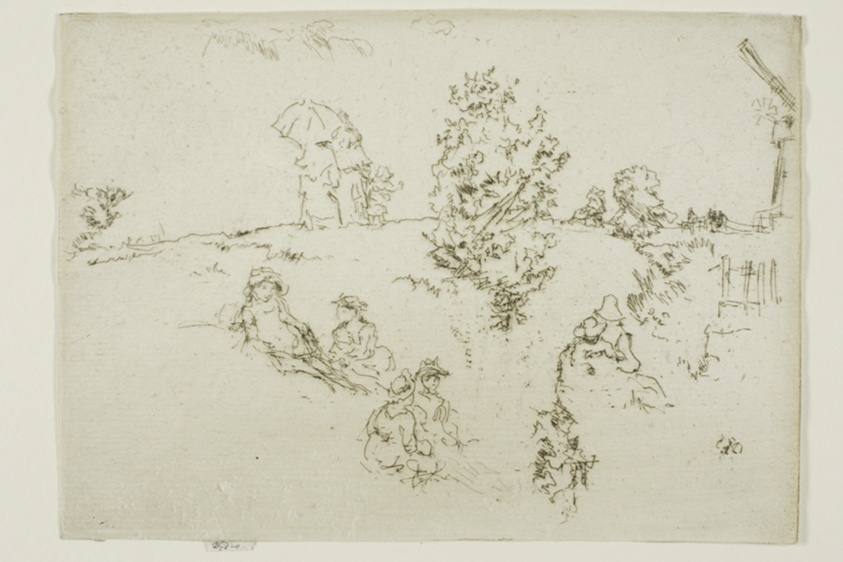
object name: Print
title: The Ramparts, Sandwich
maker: James McNeill Whistler (American, 1834-1903)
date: 1887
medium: Etching with foul biting in black ink on ivory laid paper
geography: United States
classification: etching; foul biting; print; prints and drawing; paper